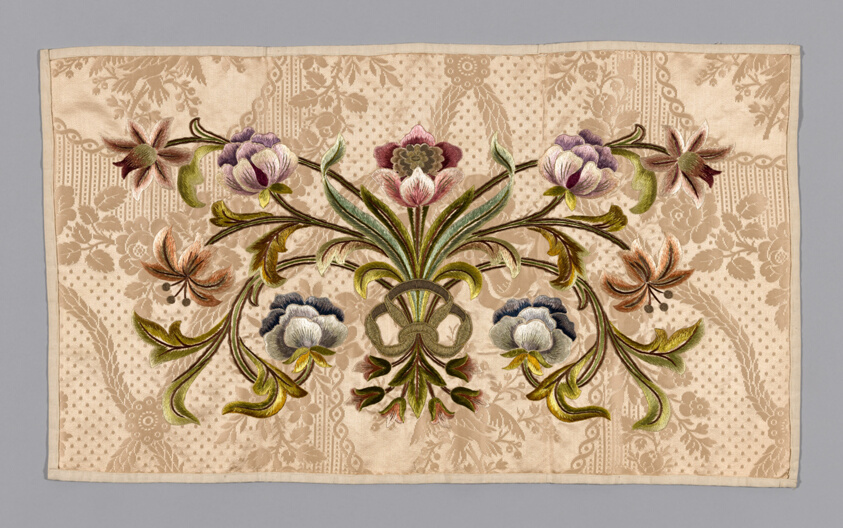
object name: Textile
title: Panel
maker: Italy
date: 19th century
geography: Italy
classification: textile; needlework (visual works)